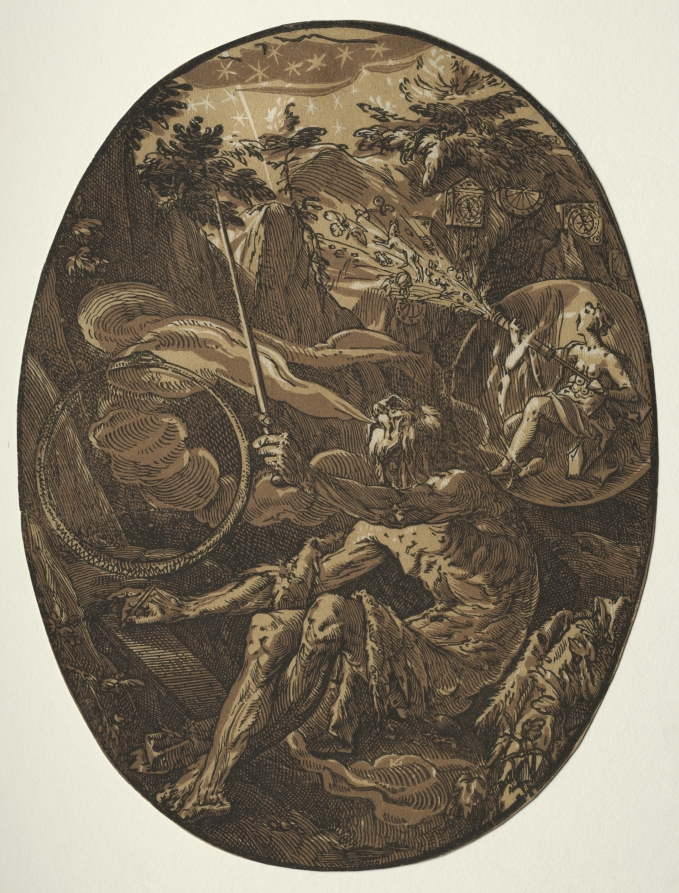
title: The Deities: Demogorgon in the Cave of Eternity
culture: Netherlands, 16th century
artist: Hendrick Goltzius (Dutch, 1558–1617)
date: 1588–90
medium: chiaroscuro woodcut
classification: Print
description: Not all witches were women; men also performed magic. Unlike the destructive and sexualized stereotypes of female witches, male magicians were likened to the philosophers, alchemists, or heroic scientists of the Renaissance. In Goltzius's print, which was so popular it was reprinted as late as the 19th century, the central male figure is Demogorgon, the omnipotent father of all gods. Although Demogorgon was feared as the "Demon-gorgon," a terror who could unleash his primordial power, Goltzius portrays the god as a wizened and magical force who uses his power to give form to the world.